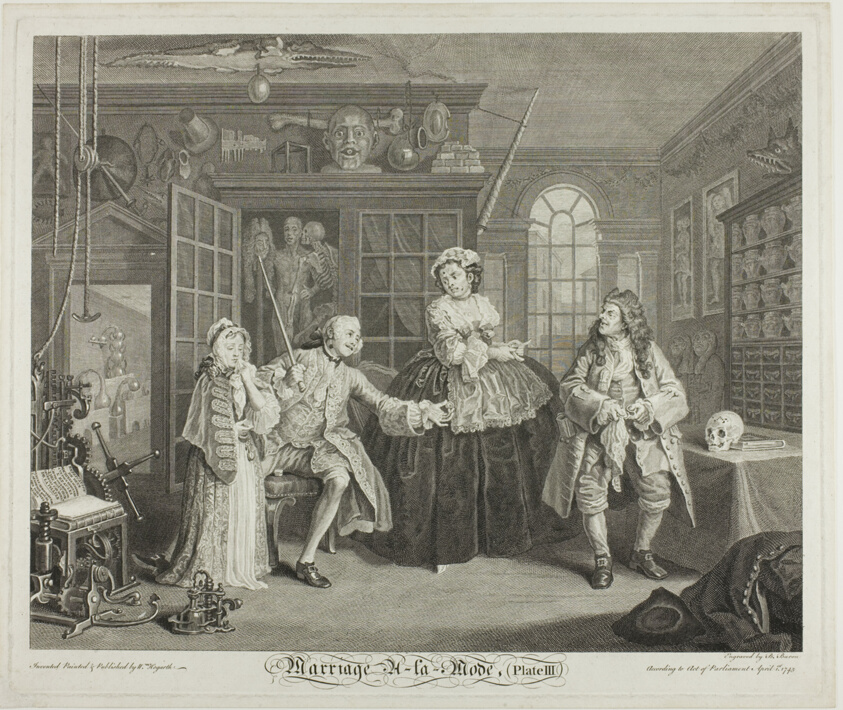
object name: Print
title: Plate Three, from Marriage à la Mode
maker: Bernard Baron (French, 1696-c. 1766); after William Hogarth (English, 1697-1764)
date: 1746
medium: Etching and engraving in black on ivory laid paper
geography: France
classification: etching; paper; print; prints and drawing